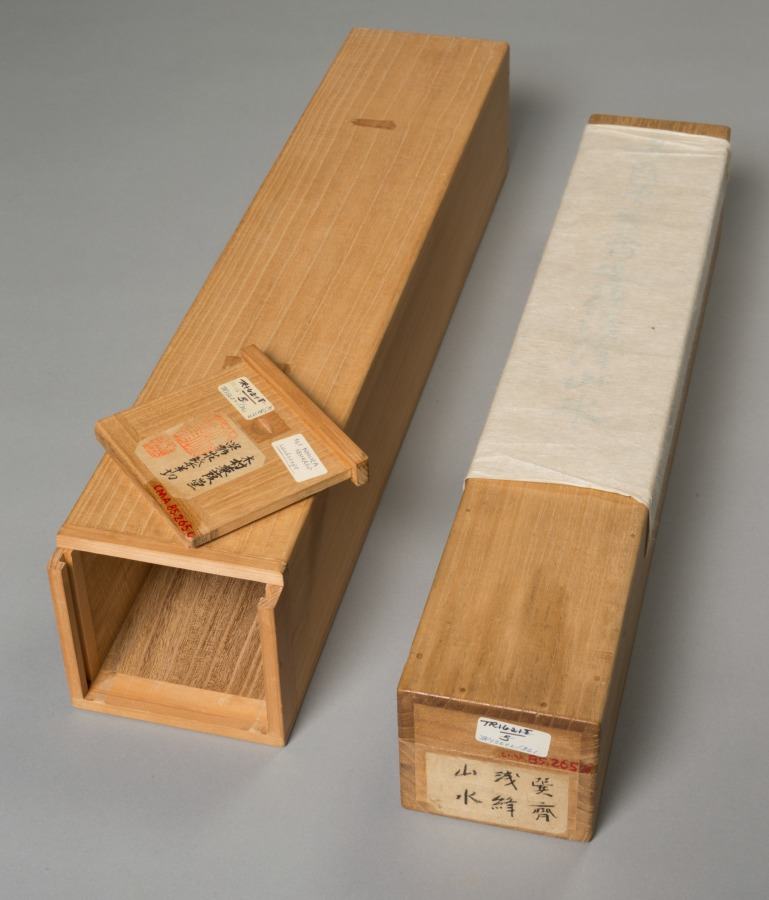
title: Landscape with Boaters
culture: Japan, Edo period (1615–1868)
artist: Kimura Kenkadō (Japanese, 1736–1802)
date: late 1700s–early 1800s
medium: hanging scroll; ink and slight color on paper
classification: Painting